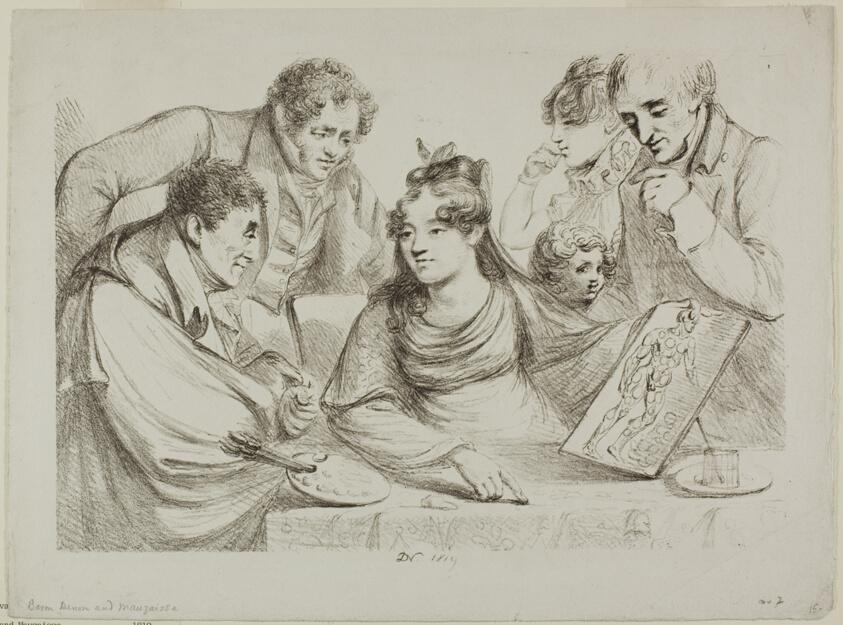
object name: Print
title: Lithography Lesson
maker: Dominique-Vivant Denon (French, 1747-1825)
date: 1819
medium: Lithograph on off-white wove paper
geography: France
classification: lithograph; print; prints and drawing